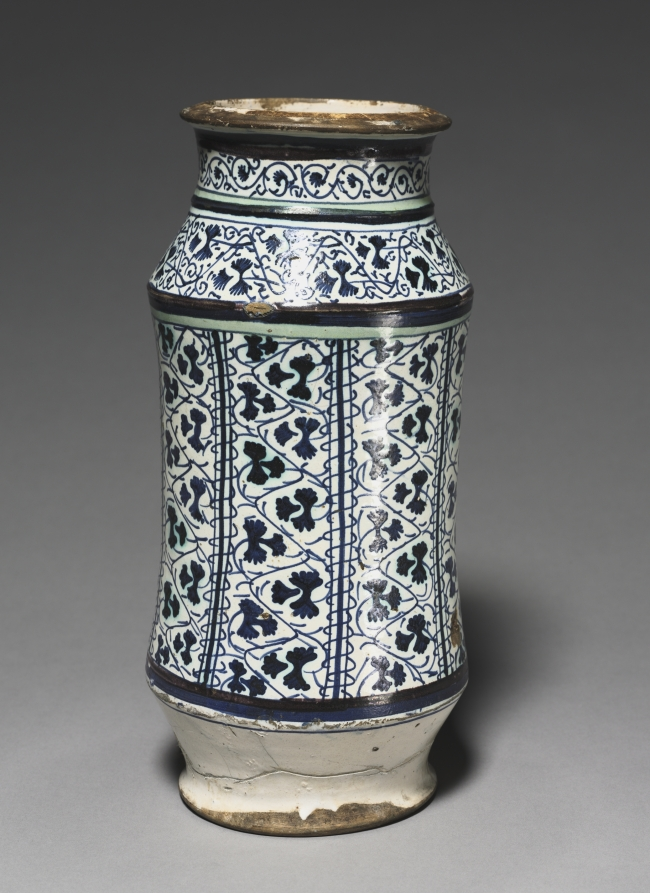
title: Pharmacy Jar (Albarello)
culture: Italy, Tuscany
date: c. 1450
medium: tin-glazed earthenware (maiolica)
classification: Ceramic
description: The albarello—a name of uncertain origin—was a pharmacist's jar used to hold dried herbs or medicinal compounds. It was usually closed by means of a piece of parchment or cloth stretched over its mouth and tied with a string. Its characteristic concave sides offered an easy grip to facilitate handling. This large albarello is one of the best of a small number of exquisitely decorated blue-and-white pieces produced in Tuscany in the mid-1400s.